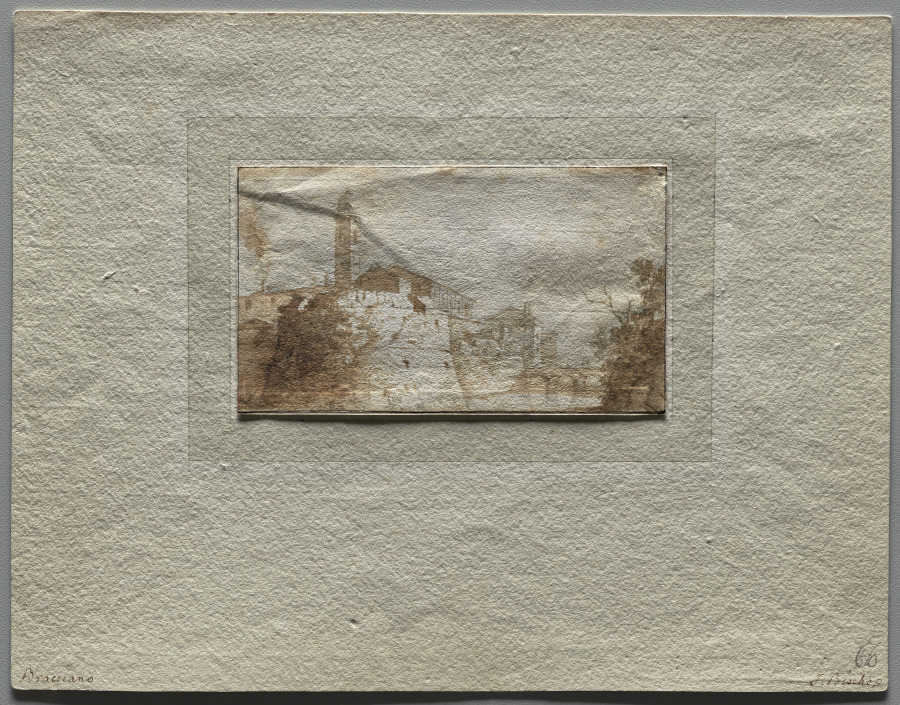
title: A View of Bracciano with the Church of S. Maria Assunta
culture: Netherlands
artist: Bartholomeus Breenberg (Dutch, 1599–1657)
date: c. 1619–33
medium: Brown and gray inks and washes applied with point of brush and brush, with traces of graphite underdrawing on cream antique laid paper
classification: Drawing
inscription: Written in brown ink on recto of mount, lower left: "Bracciano"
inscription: Written in brown ink on recto of mount, lower right: "J. Bischop"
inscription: Written in pencil on recto of mount, lower right: "610"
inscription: Written in pencil on verso of mount: "53"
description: In the early 1600s, artists from Northern Europe began to take long trips to Italy as part of their artistic training. Bartholomeus Breenberg traveled to Italy around 1620 and probably stayed for at least 12 years. While there, he sketched ancient ruins and the countryside, features he would use in his paintings when he returned to Amsterdam in the 1630s. The area around the Lago di Bracciano, a volcanic lake northwest of Rome, was home to several medieval villages that provided charming vistas for artists. In his view, Breenberg emphasized the crumbling turret of a medieval castle in Bracciano in front of the ordered, linear outline of the Church of Santa Maria Assunta beyond. Combining gray and brown ink washes to plot gradations in tone, he created vivid contrasts of light and shade, capturing the effects of the bright Italian sunshine.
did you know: In the early 17th century, European artists were just beginning to make sketches such as this one outdoors and onsite.